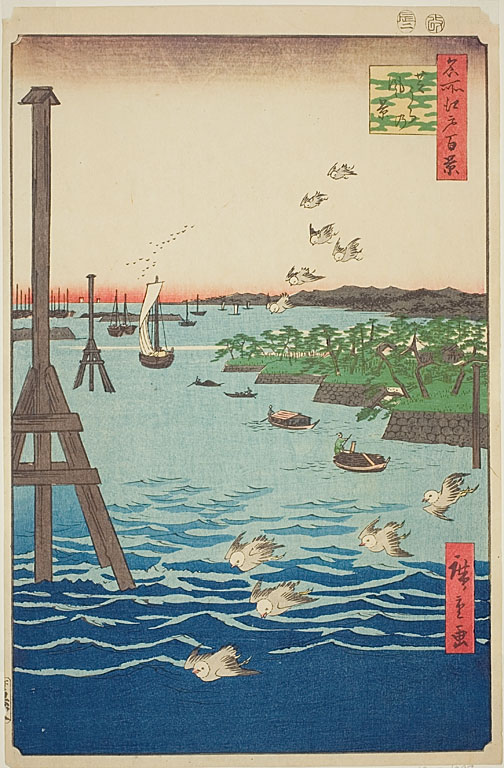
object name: Print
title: View of Shiba Coast (Shibaura no kei), with light and dark blue water, No.108 from the series One Hundred Famous Views of Edo (Meisho Edo hyakkei)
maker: Utagawa Hiroshige (Japanese, 1797-1858)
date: 1856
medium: Color woodblock print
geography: Japan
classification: woodblock print; print; asian art